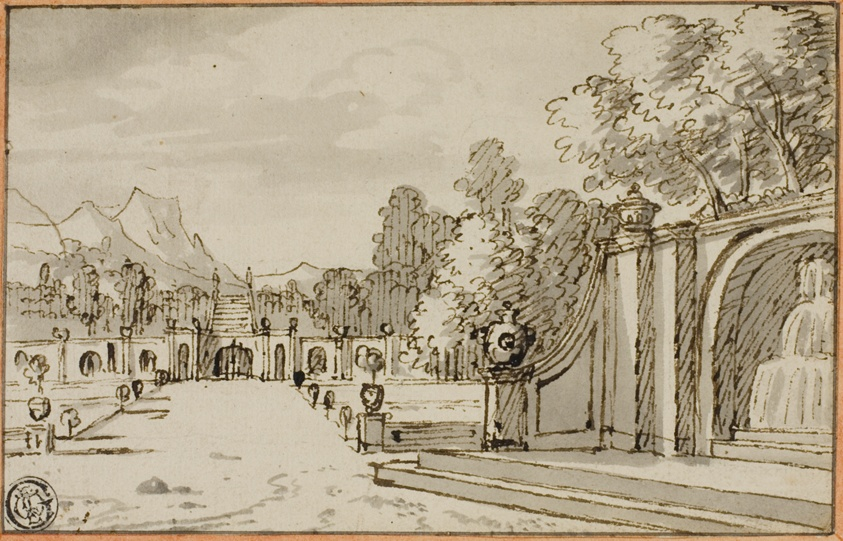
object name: Drawing and Watercolor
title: Formal Garden with Fountain in Foreground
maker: Bernard Picart (French, 1673-1733)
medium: Pen and brown ink, with brush and gray wash, over traces of graphite, on ivory laid paper, laid down on cream laid paper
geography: France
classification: pen and ink drawings; drawings (visual works); prints and drawing